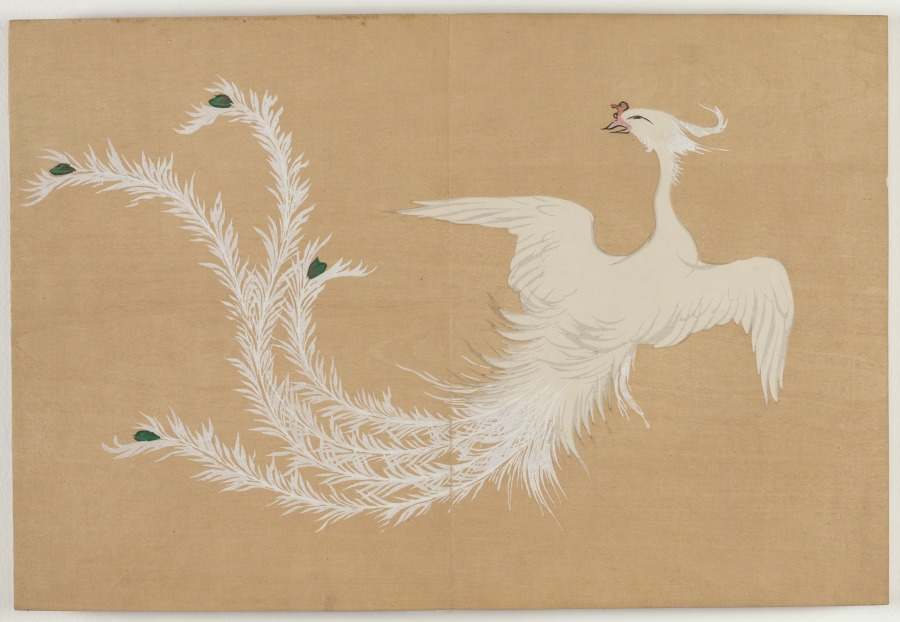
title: Flowers of a Hundred Worlds (Momoyogusa): White Phoenix (Hakuho)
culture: Japan, Meiji period (1868–1912)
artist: Kamisaka Sekka (Japanese, 1866–1942)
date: 1909–10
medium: color woodcuts with gold and silver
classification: Bound Volume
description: This print from a set of three woodblock printed albums displays the graphic design prowess of Kamisaka Sekka. The images were first distributed one by one to subscribers to the series but later were reissued in bound form, like this book, for mass consumers. Each print features a vignette taken from nature or Japanese literature. Many of the scenes have a long history in Japan, originating in the 900s or 1000s and having been interpreted by all manner of artists since that time. Sekka’s selections hew closely to precedents from the Rinpa style originated by painter Tawaraya Sōtatsu (c. 1570–c. 1640) and calligrapher Hon’ami Kōetsu (1558–1637).